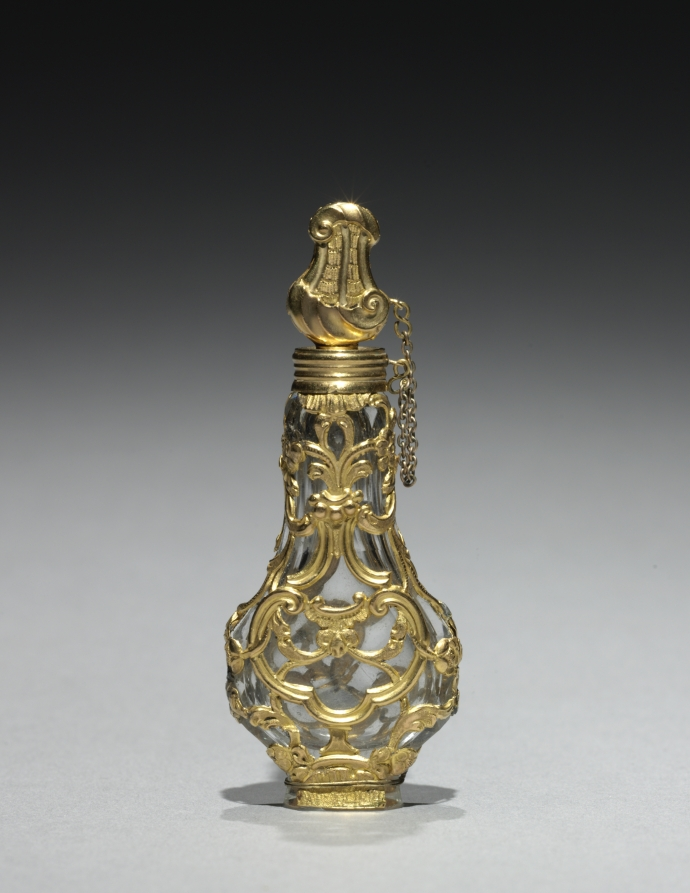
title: Scent Bottle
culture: France, 18th century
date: c. 1775 (?)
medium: glass mounted in gold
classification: Miscellaneous